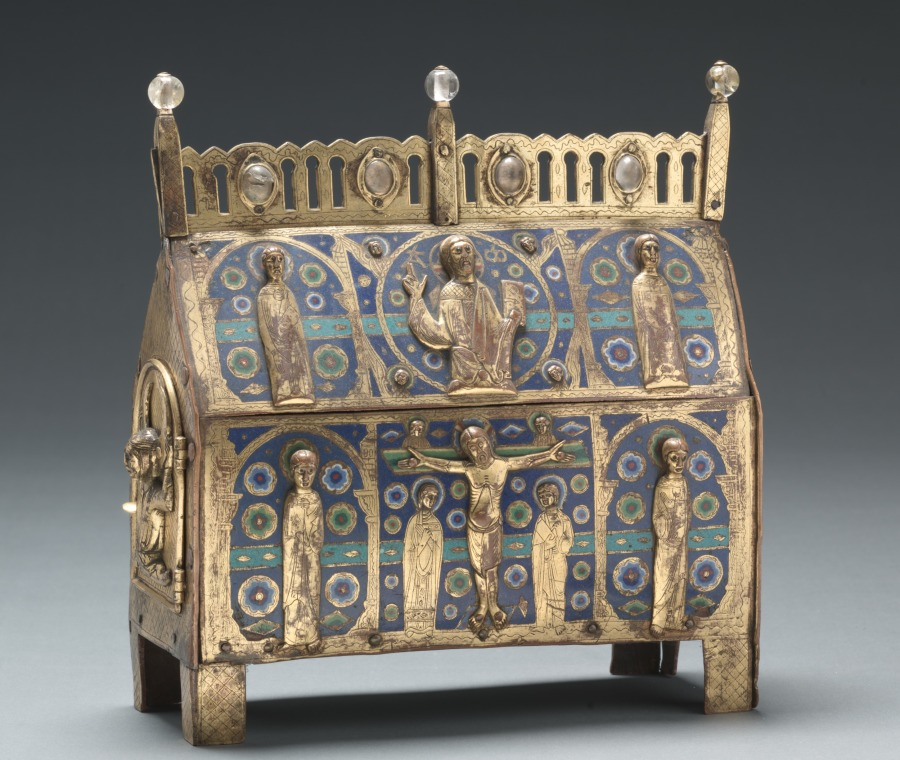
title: Chasse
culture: France, Limousin, Limoges, Gothic period, 13th century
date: c. 1225–50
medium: copper: repoussé, engraved, stippled, and gilded; champlevé enamel; oak core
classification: Enamel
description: A chasse is a container with a pyramid-shaped roof that once served as a shrine for sacred relics. During the medieval period, chasses like this one were placed on church altars during high feast days to allow the faithful to venerate their sacred contents. The chasse’s design and imagery follow a common formula with Christ’s Crucifixion and Majesty decorating the central fields of its principal face. The back consists of two panels with identical decoration. Each features three busts of angels inscribed in medallions. Of the chasse’s lateral sides, only one is preserved in its original state, decorated with the figure of an imposing angel emerging from a bank of clouds. Here, the dark blue enamel background shows an even greater variety of rosettes and other decorative motifs, all engraved, stippled, and gilded like the ones on the other sides